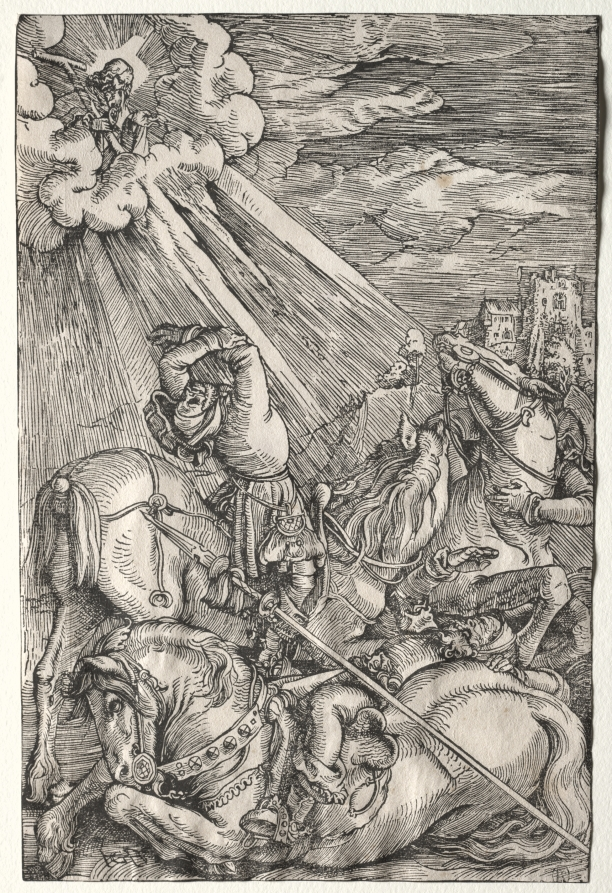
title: The Conversion of St. Paul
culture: Germany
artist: Hans Baldung (German, 1484/85–1545)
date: c. 1515–17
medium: woodcut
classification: Print